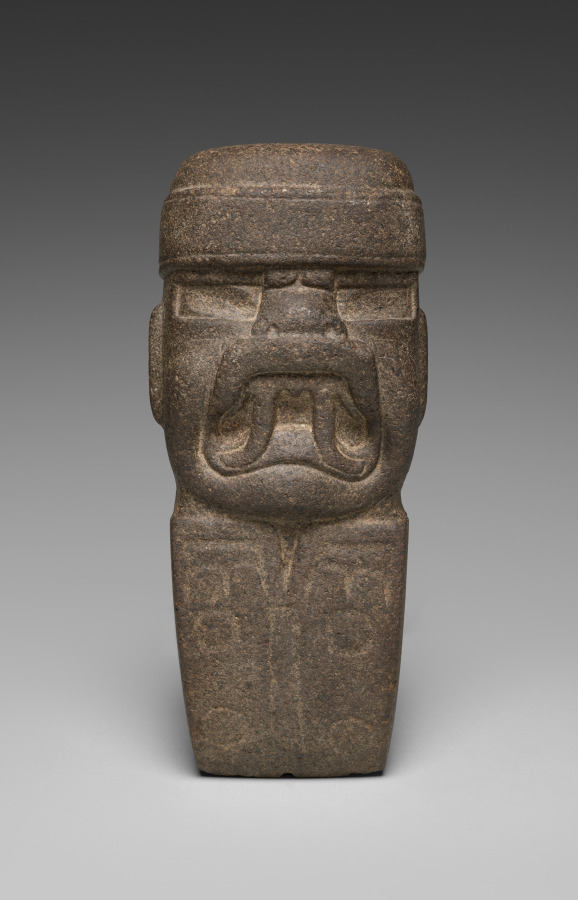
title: Celt with Deity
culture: Mesoamerica, Mexico, Olmec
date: 1000–300 BCE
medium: stone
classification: Sculpture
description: This ceremonial object has the head of a deity and a body shaped like an axe blade (celt) used to clear land for agriculture. The flared mouth, toothless gums, and fangs are typical of Olmec supernatural beings. The meaning of the body's "four-dots-and-a-bar" motif is unclear, but it sometimes appears in depictions of plants. The deity, then, seems to be associated with fertility.